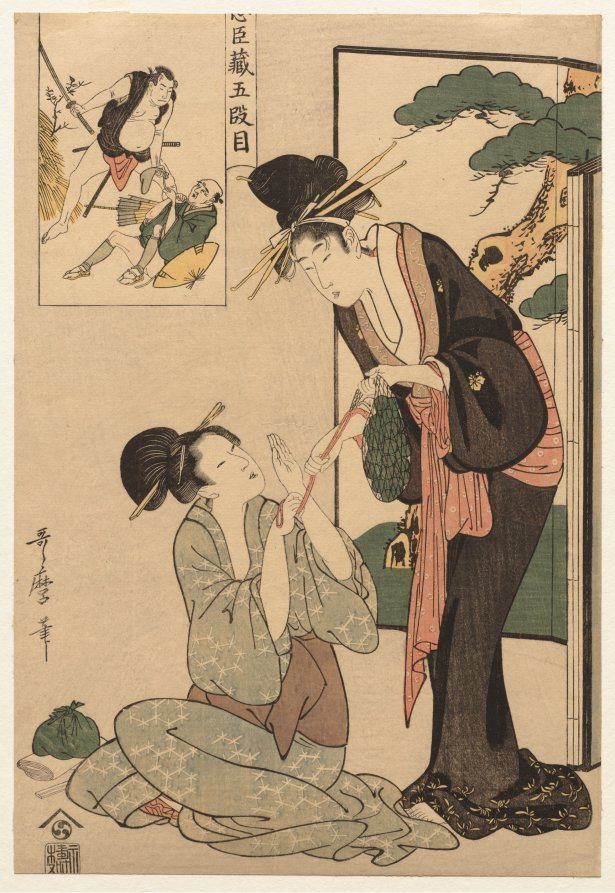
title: Chushingura: Act V of The Storehouse of Loyalty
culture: Japan, Edo period (1615–1868)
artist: Kitagawa Utamaro (Japanese, c. 1754–1806)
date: late 1790s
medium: color woodblock print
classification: Print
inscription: Artist's signature: Utamaro hitsu.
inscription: Publisher: Nishimuraya Yohachi (Eiju han, emblem).